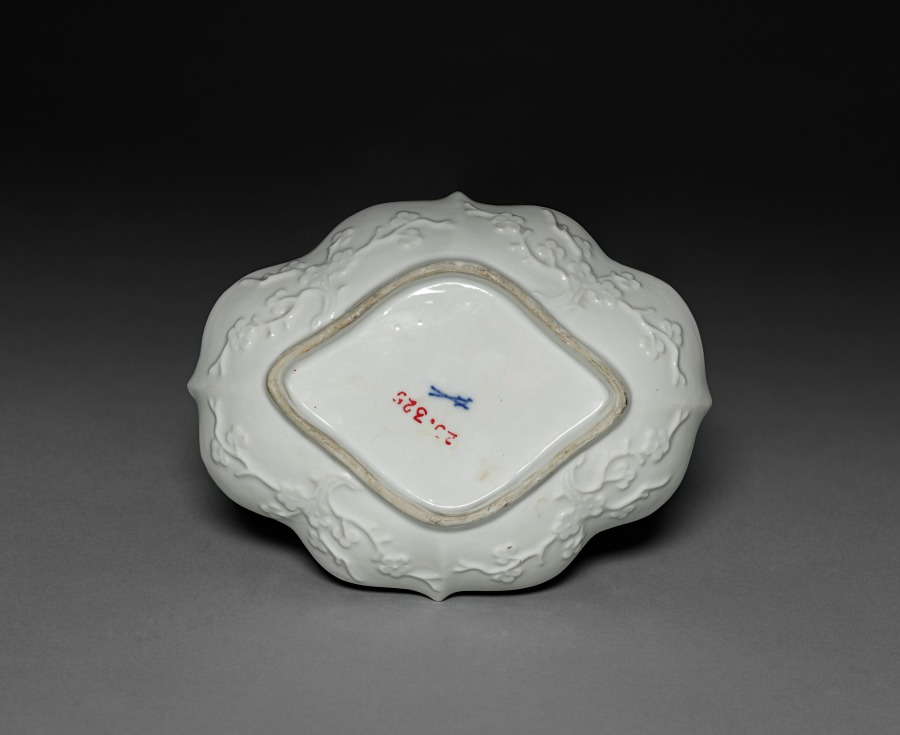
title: Dish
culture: Germany, Meissen, 18th century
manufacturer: Meissen Porcelain Factory (German, est. c. 1710)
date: c. 1750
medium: porcelain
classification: Ceramic